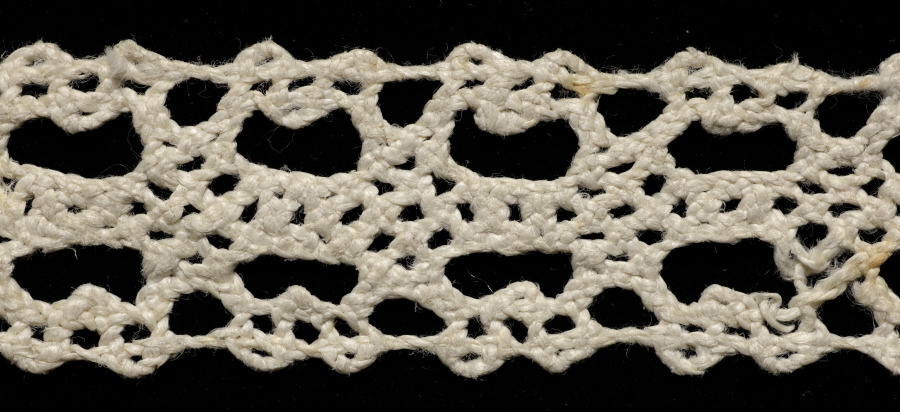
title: Lace Insertion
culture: Italy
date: 1600s–1700s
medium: Bobbin lace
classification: Lace